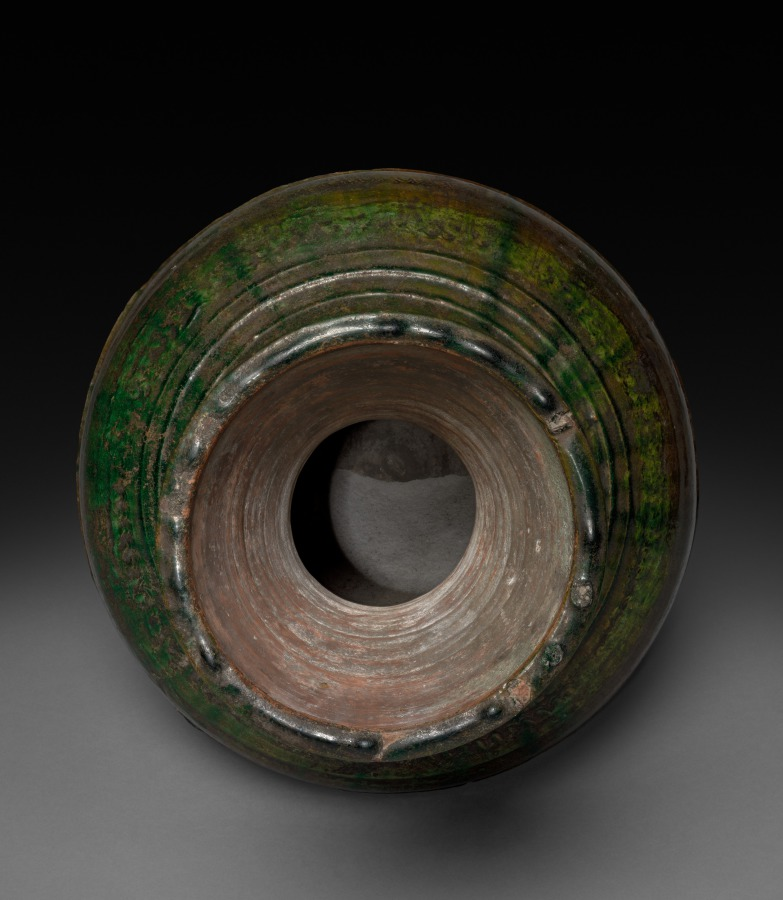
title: Jar (Hu)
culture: China, Han dynasty (202 BCE–220 CE)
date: 206 BCE–220 CE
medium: earthenware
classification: Ceramic